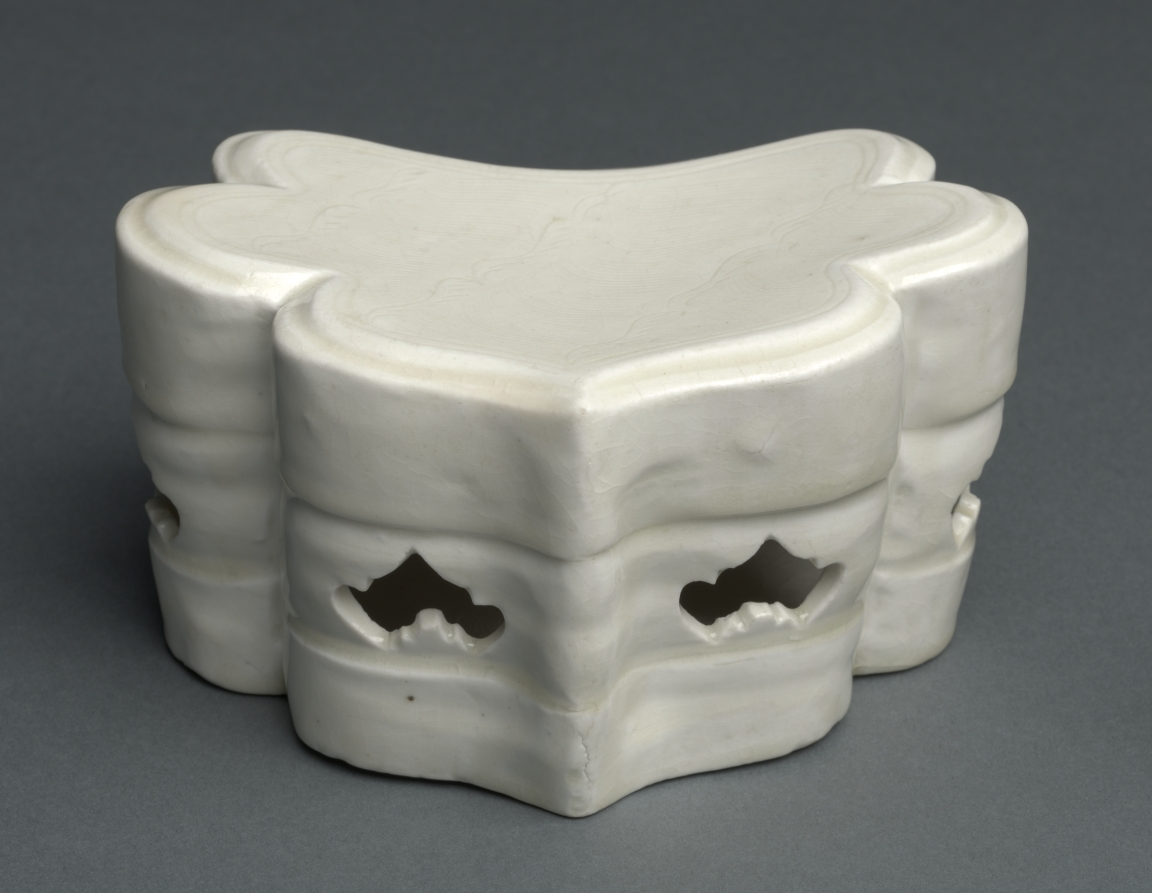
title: Cloud-Collar Pillow with Waves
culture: China, Jiangxi Province, Northern Song dynasty (960–1127)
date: 1000s–1100s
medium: glazed porcelain with incised and carved decoration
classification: Ceramic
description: This ceramic pillow in the form of a cloud—a design pattern variously referred to as ruyi, the shape of a head of an auspicious scepter—is a fine example of qingbai ware from Jiangxi province. It has a pure white body covered with a transparent, glassy glaze that carries a faint greenish tinge, thus giving it another name, yingqing, or "shadow blue." On the surface of the pillow is a carved and incised design of repeating wave patterns. The beauty of this piece lies in its elegance of form, simplicity of design, and delicacy of workmanship.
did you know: While ceramic might not be your choice for a pillow, it actually kept the user cool as they slept.